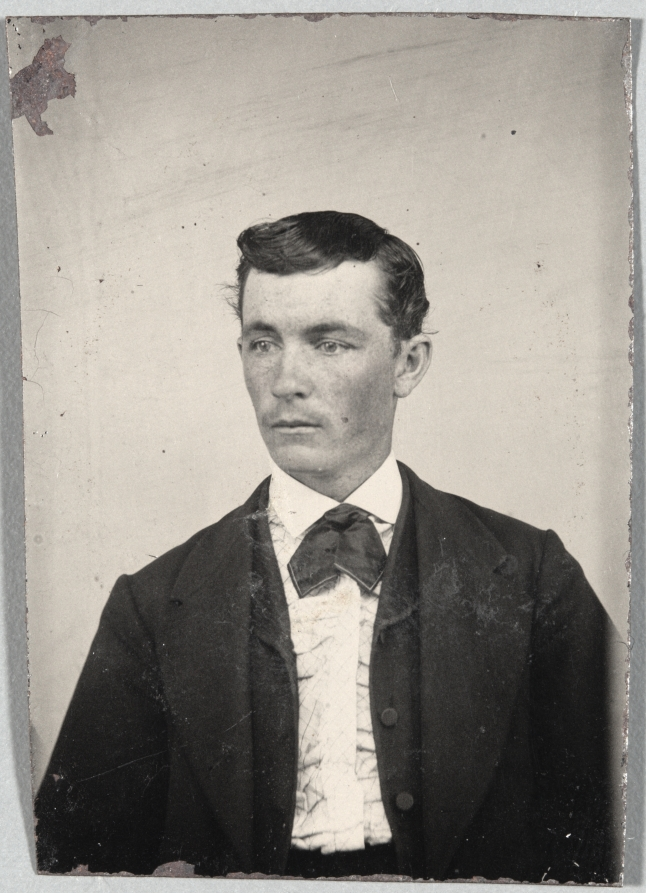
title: Untitled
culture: America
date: c. 1860s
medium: tintype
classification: Photograph